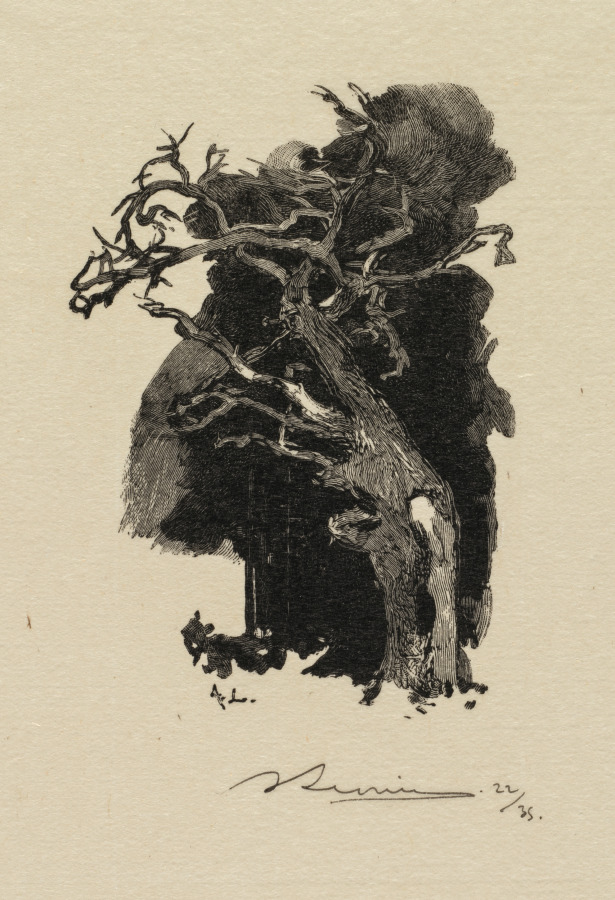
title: Fontainebleau Forest: The Raging One (La Forêt de Fontainebleau: Le rageur)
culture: France, 19th century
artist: Auguste Louis Lepère (French, 1849–1918)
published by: A. Desmoulins, Published in Revue Illustrée, 1887–90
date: 1890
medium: wood engraving from bound volume of 34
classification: Bound Volume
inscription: On window mat, lower right, in graphite: Le rageur